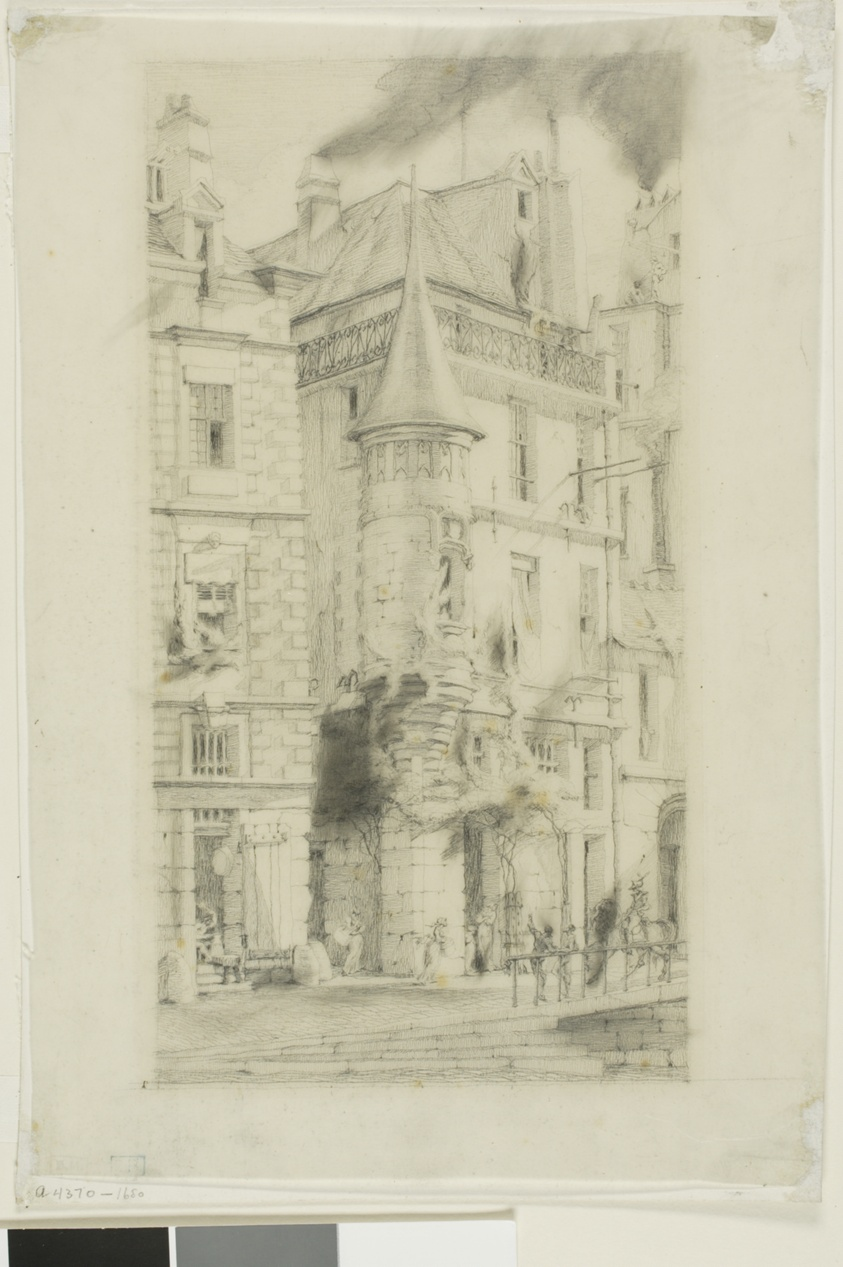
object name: Drawing and Watercolor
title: House with a Turret, rue de la Tixéranderie, Paris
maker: Charles Meryon (French, 1821-1868)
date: 1852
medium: Graphite, with smudging, on cream tracing paper, tipped on ivory wove card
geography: Paris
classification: graphite; drawings (visual works); prints and drawing